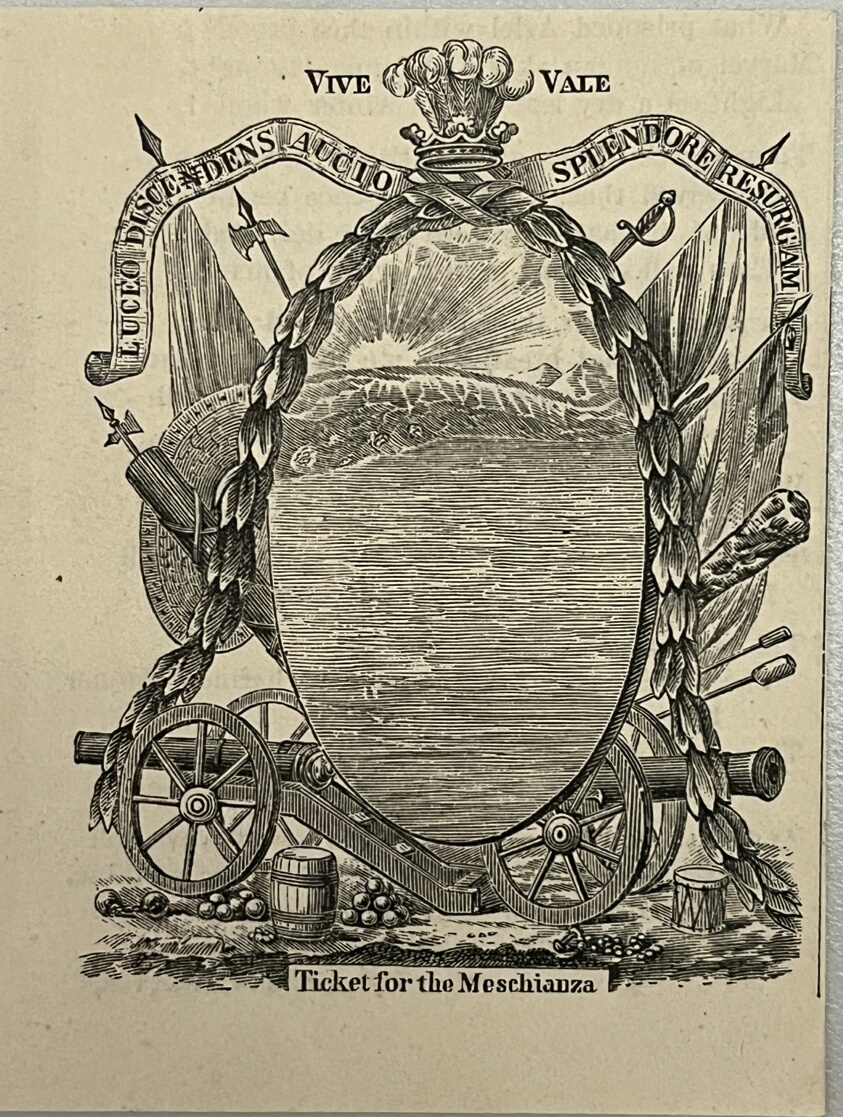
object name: Print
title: Ticket for the Meschianza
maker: Artist Unknown (Likely American or British, 19th century)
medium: Photolithograph on paper with text printed on verso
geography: United States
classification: reproduction; print; prints and drawing